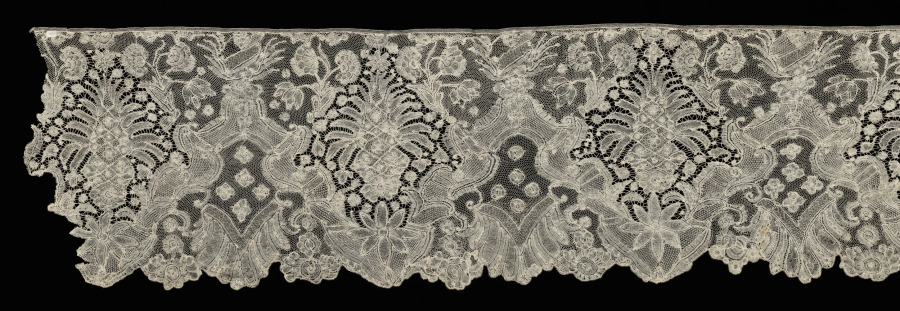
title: Lace Flounce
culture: Belgium, Brabant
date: 1700–1720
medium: Linen: bobbin lace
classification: Lace